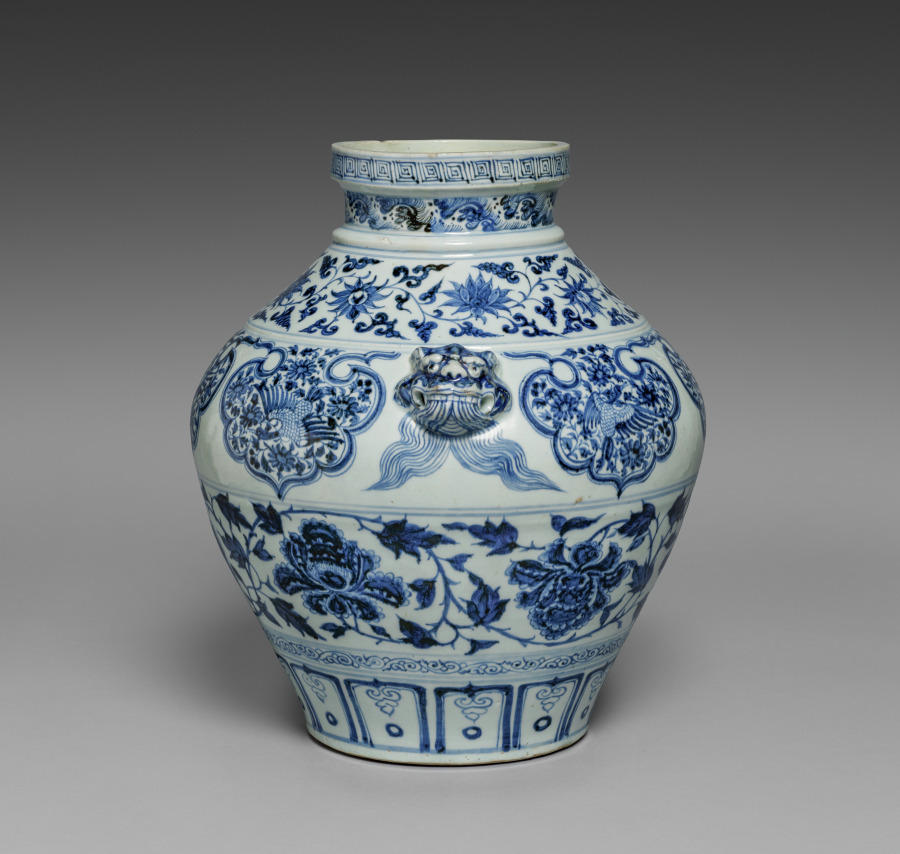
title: Jar with Lion-Head Handles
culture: China, Jiangxi Province, Jingdezhen, Yuan dynasty (1271–1368)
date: 1300s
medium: porcelain with underglaze painted decoration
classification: Ceramic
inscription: 南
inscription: 宮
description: Appreciated for its strong profile, brilliant blue color, and firm delineation of the decorative patterns, this jar is a classic example of Yuan dynasty blue-and-white ware. This type of ware was produced no later than the 1330s for both domestic use (the court and common people alike) and overseas trade. This example testifies to the transmission of artistic ideas and techniques between China and the rest of the great Mongol Empire as a result of trade. The cobalt that was used for the blue underglaze decoration was imported from Iran, likely from Kashan. The band of cloud-collar motifs with phoenixes set against floral grounds, as shown here, is an artistic vocabulary that can also be found in Iranian decorative arts of the Ilkhanid period (1256–1353).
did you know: The characters for "palace" and "south" are scratched into the white glaze on the vessel's shoulder, suggesting that it was once kept in a specific location in a palace.